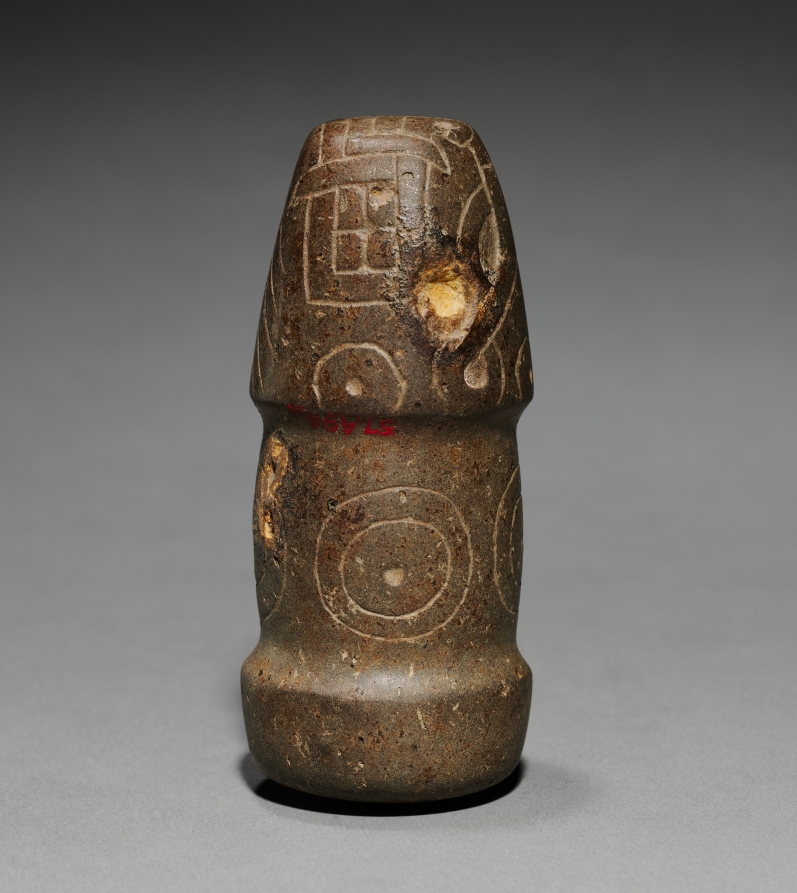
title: Pestle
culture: Peru, North Highlands, Pacopampa(?), Chavín style (900-200 BCE)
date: 700–1 BCE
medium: stone, pigment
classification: Stone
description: Size suggests that this Chavín-style pestle was not used to grind bulky staples like corn, but instead pigments or plant hallucinogens used in religious rites to achieve spiritual insight and communion with cosmic forces. This may come from Pacopampa, a site in the northern highlands where elites adopted Chavín deities and worshiped them alongside local deities. These small sculptures illustrate the appeal and the spread of Chavín religion.